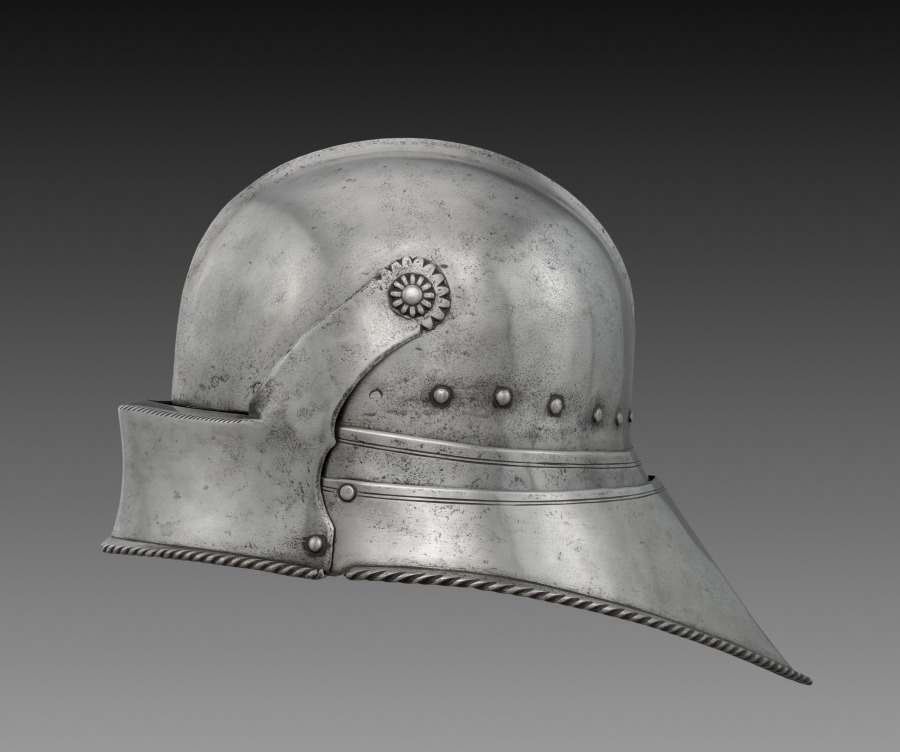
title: Visored Sallet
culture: Germany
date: c. 1490–1500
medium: steel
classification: Arms and Armor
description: The sallet is a partly open-face helmet common in Europe during the 1400s, used in both equestrian and infantry versions. Sallets with movable visors, like this example, are considered to be more technically and visually interesting; beautifully streamlined, it assumes a highly sculptural teardrop shape. Originally it would have been part of a complete suit of armor. The sallet became the quintessential helmet form of the late Middle Ages and is frequently represented in medieval miniatures and woodcuts.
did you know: Medieval sallets were design inspiration for modern-day fireman's helmets.